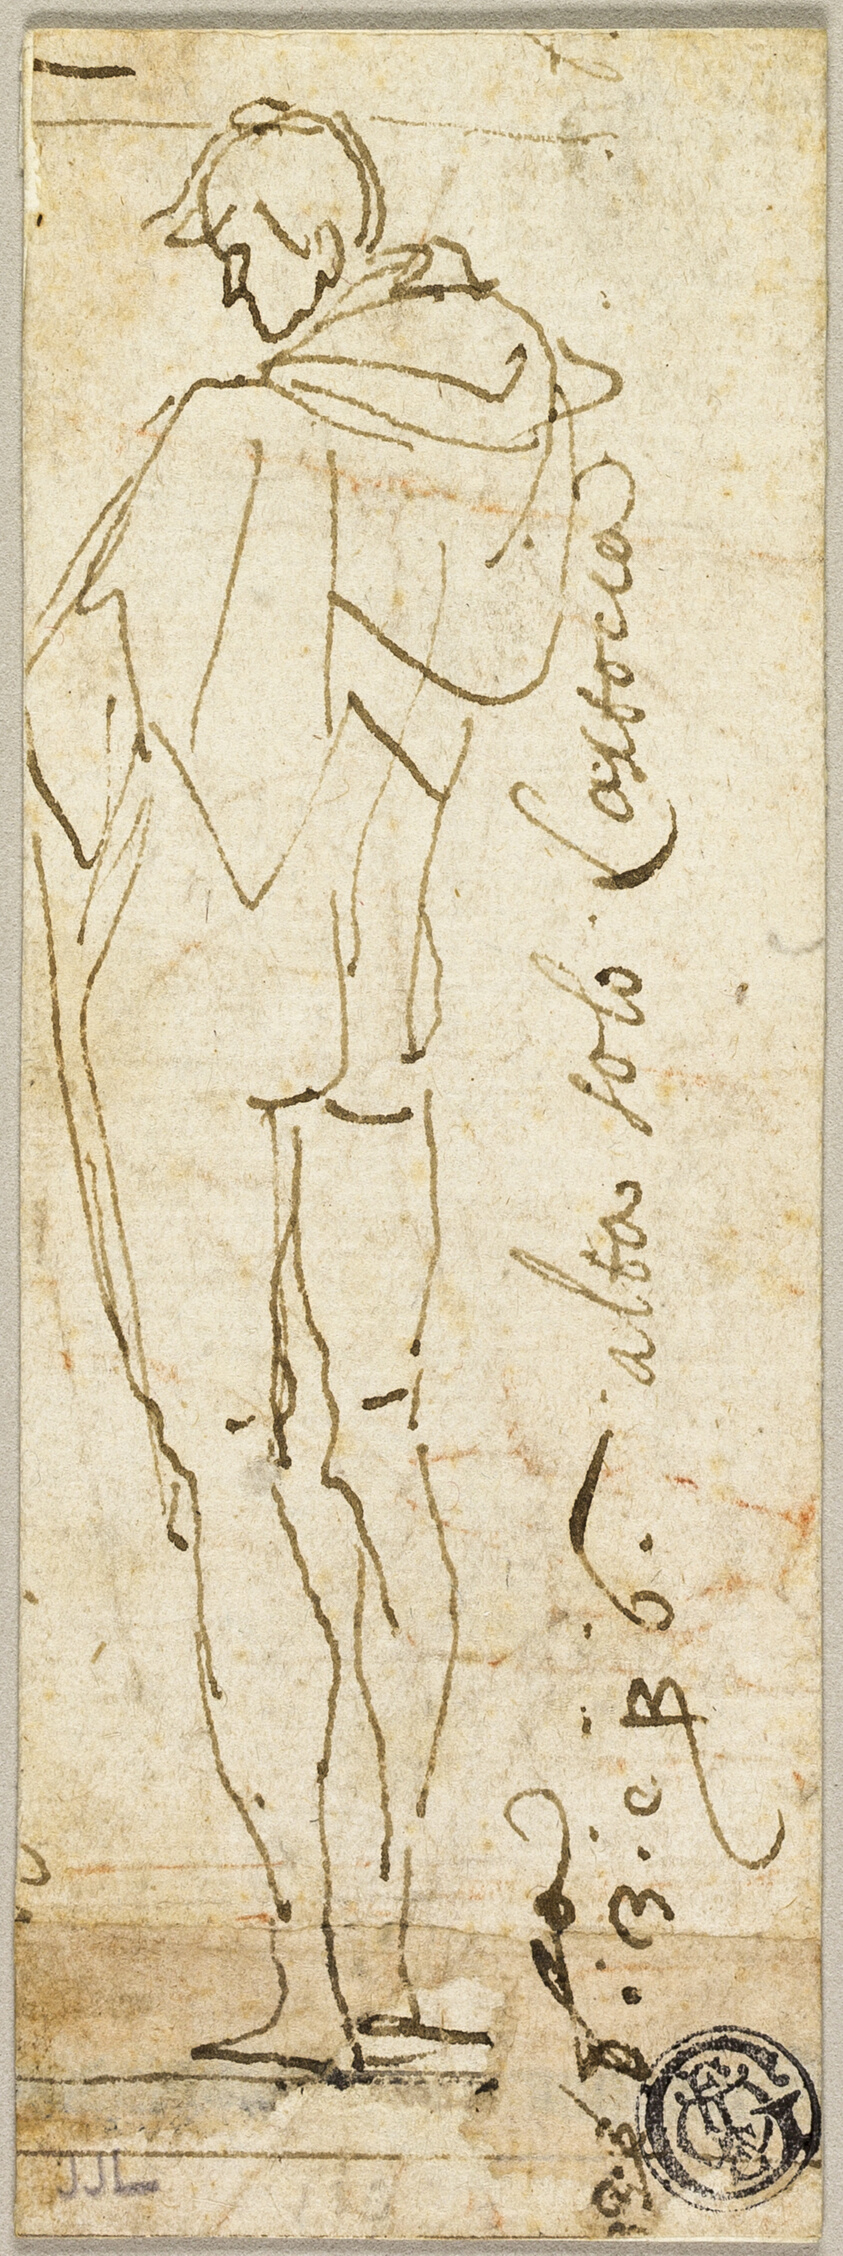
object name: Drawing and Watercolor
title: Standing Male Nude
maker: After Andrea del Sarto; Italian, 1486-1530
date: 1680/99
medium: Pen and brown ink on ivory laid paper, laid down on ivory laid paper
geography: Italy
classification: pen and ink drawings; drawings (visual works); prints and drawing